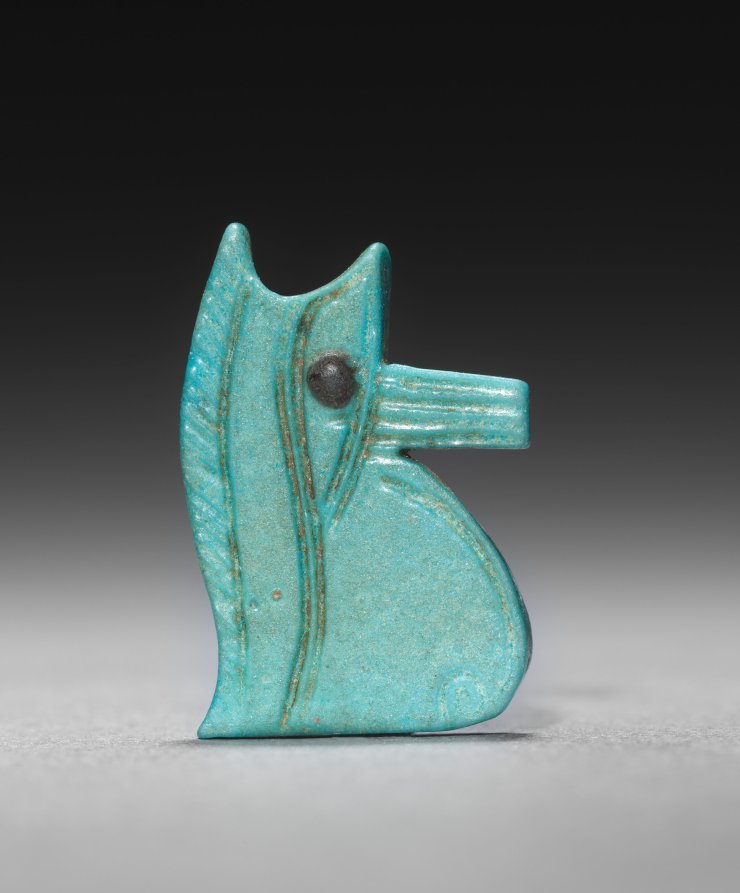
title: Eye of Horus Amulet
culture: Egypt, Third Intermediate (1069–715 BCE), Dynasties 22–25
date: 945–715 BCE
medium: turquoise faience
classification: Amulets